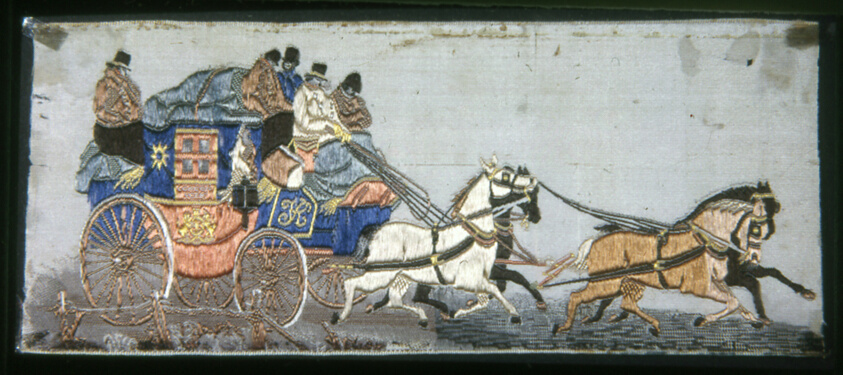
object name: Textile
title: "The London & York Royal Mail Coach"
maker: Woven by Thomas Stevens (English, 1828–88); Coventry, England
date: 1879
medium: Silk, plain weave with supplementary brocading wefts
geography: Coventry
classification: textile; weaving